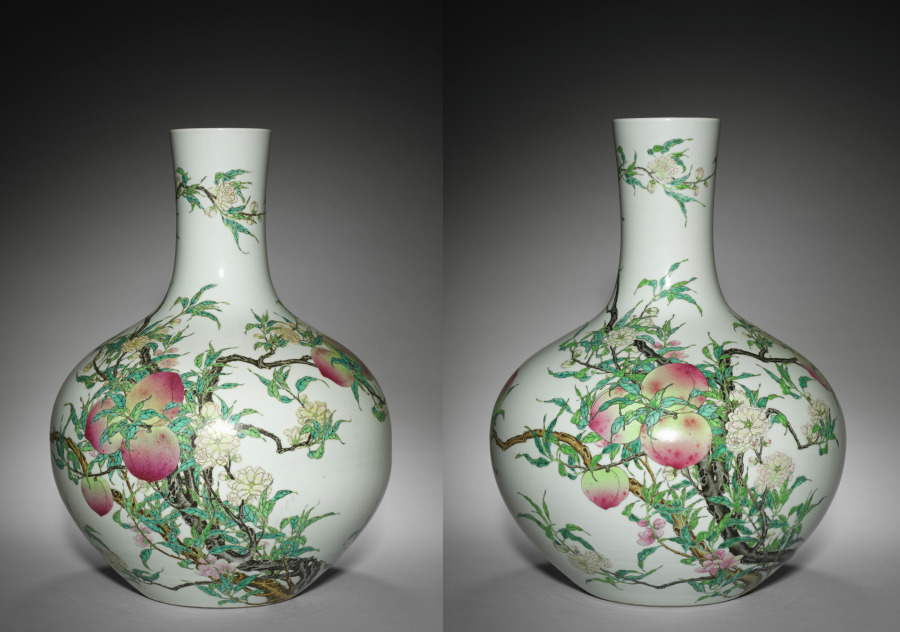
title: Pair of Vases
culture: China, Jiangxi province, Jingdezhen, Qing dynasty (1644-1911), Qianlong mark and period (1736-1795)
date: 1736–95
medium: porcelain with famille rose overglaze enamel decoration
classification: Ceramic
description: This spectacular vase, one of a pair in the collection, depicts flowering and fruiting peach trees to convey an auspicious message of affluence and long life. Developments in enamel technology led to new possibilities in polychrome decoration of Qing imperial porcelains. Pinks appeared, lending their name to the new palette of overglaze colors (famille rose), and the addition of opaque white allowed painters to vary the value of pigments, enhancing the painterly quality of porcelain decoration.